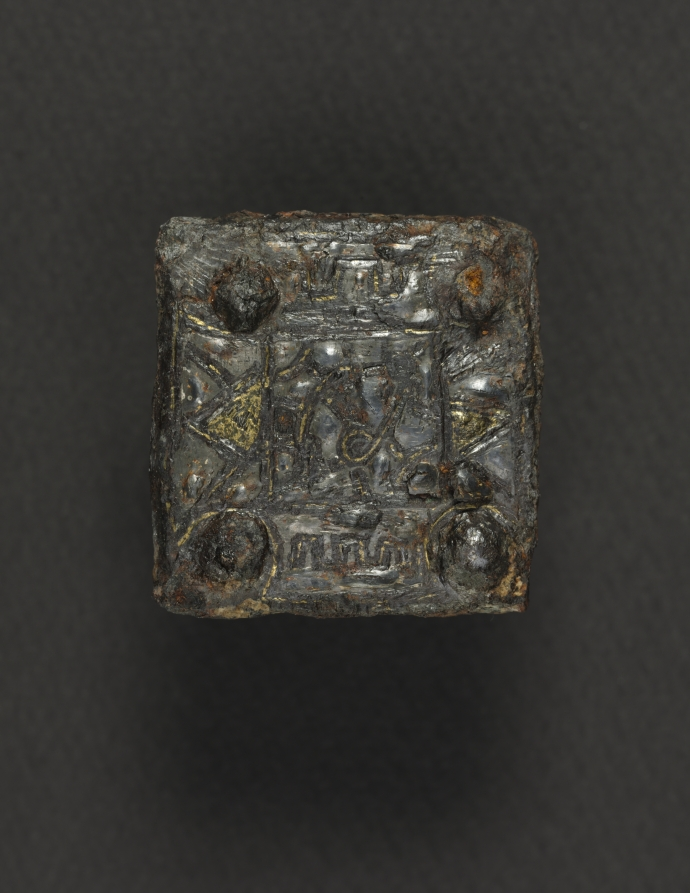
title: Belt Plate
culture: Frankish, Migration period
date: 600s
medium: iron with silver overlay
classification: Jewelry